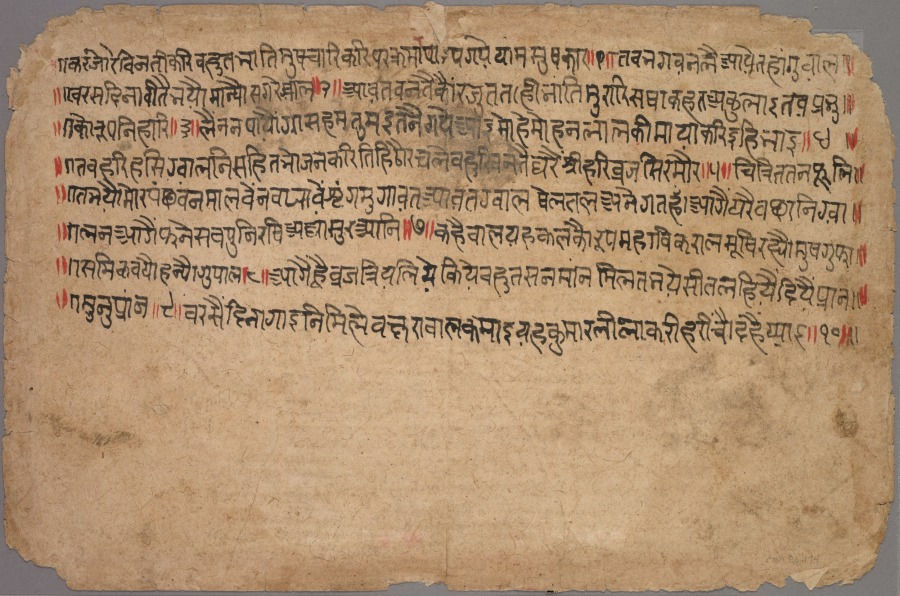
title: Krishna Playing the Flute and other Episodes from the Bhagavata Purana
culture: India, Rajasthan, Malwa school, 17th century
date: c. 1650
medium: Gum tempera and ink on paper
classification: Painting